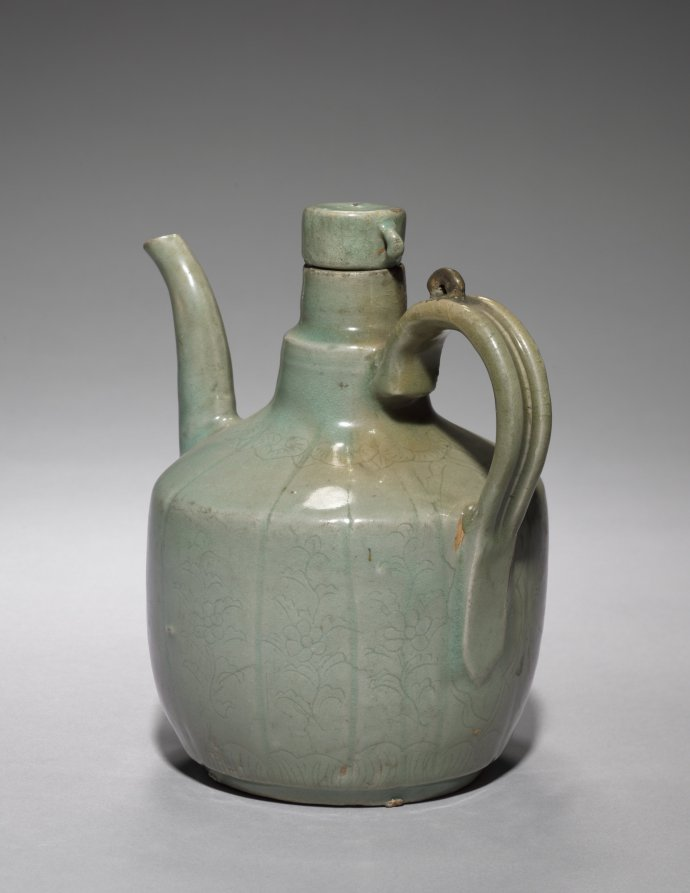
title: Wine Pot with Incised Chrysanthemum Design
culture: Korea, Goryeo dynasty (918–1392)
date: 1100s-1200s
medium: pottery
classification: Ceramic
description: As early as the seventh century, the practice of drinking tea and wine became an important part of elite culture in Korea. Elites of the Goryeo period commissioned a variety of types of utensils and vessels including this elegant wine pot, not only to make their drinking experience more exciting, but also to show their appreciation of nature.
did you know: A chain or cord once connected a small loop on the handle and the lid to serve beverages without spilling.